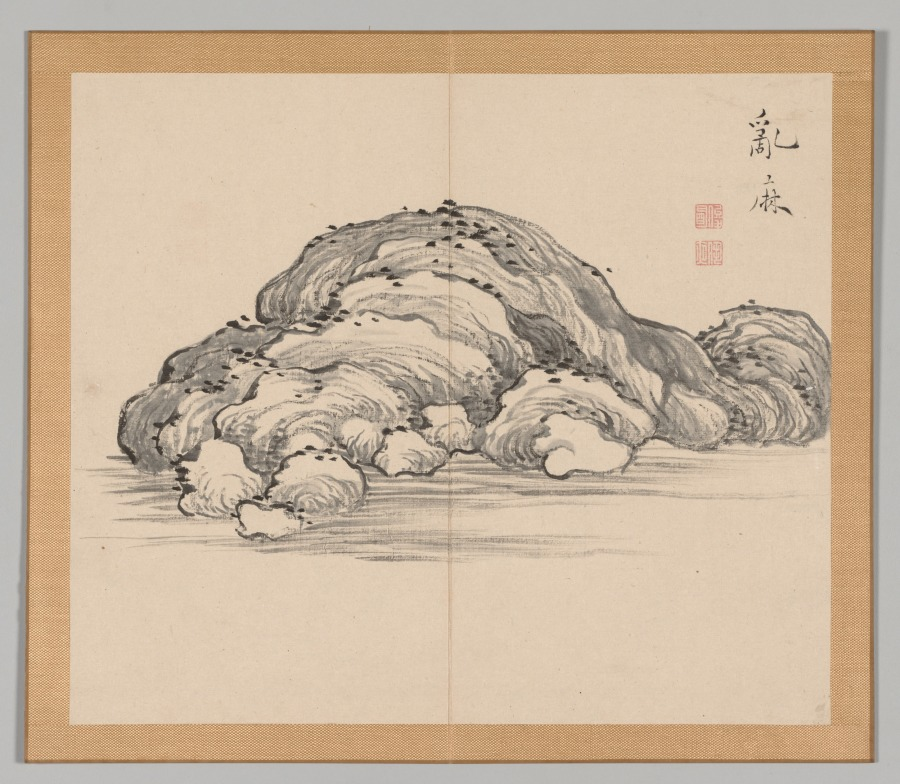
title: Reverberations of Taiga, Volume 1 (leaf 12)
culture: Japan, Edo period (1615–1868)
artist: Aoki Shukuya (Japanese, d. 1802)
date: mid- to late 1700s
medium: double-leaf from a pair of albums; ink and light color on paper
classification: Portfolio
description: Traditionally, young painters in Japan began their studies with an established master-painter. The master's compositions invariably became models that the apprentice copied to learn various ink and brush techniques. Shukuya was a pupil of the famous Kyoto artist Ikeno Taiga, whose style is reflected in these sketches of rocks, trees, and mountains.